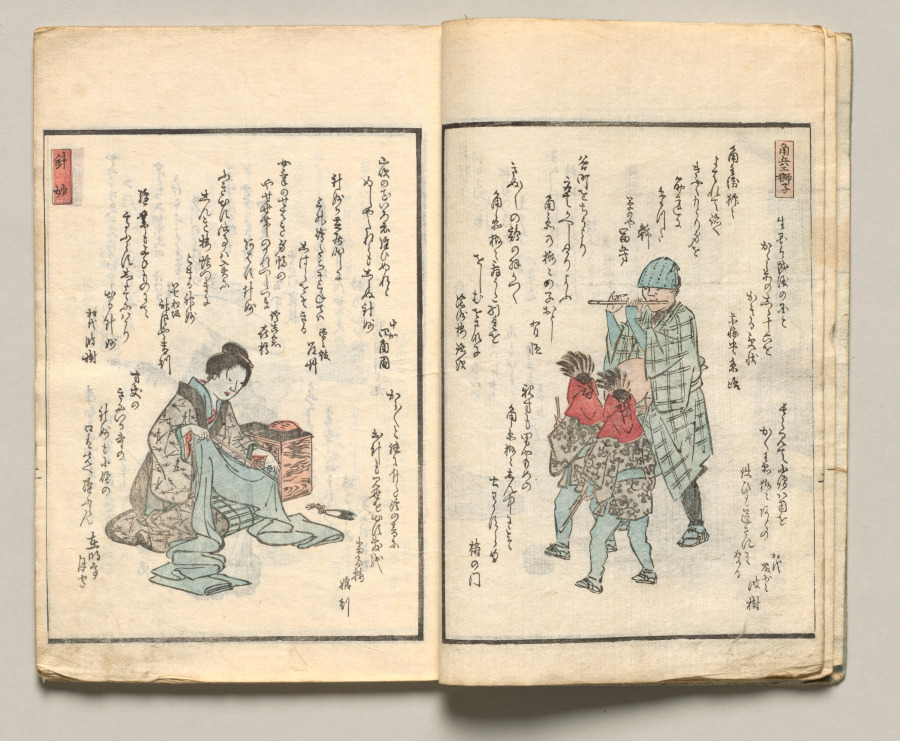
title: Spread Three from Volume Six of People of Japan in Light Verse (Kyōka)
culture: Japan, Edo period (1615–1868)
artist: Utagawa Hiroshige (Japanese, 1797–1858)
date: 1857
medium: Woodblock-printed book; ink and color on paper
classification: Bound Volume